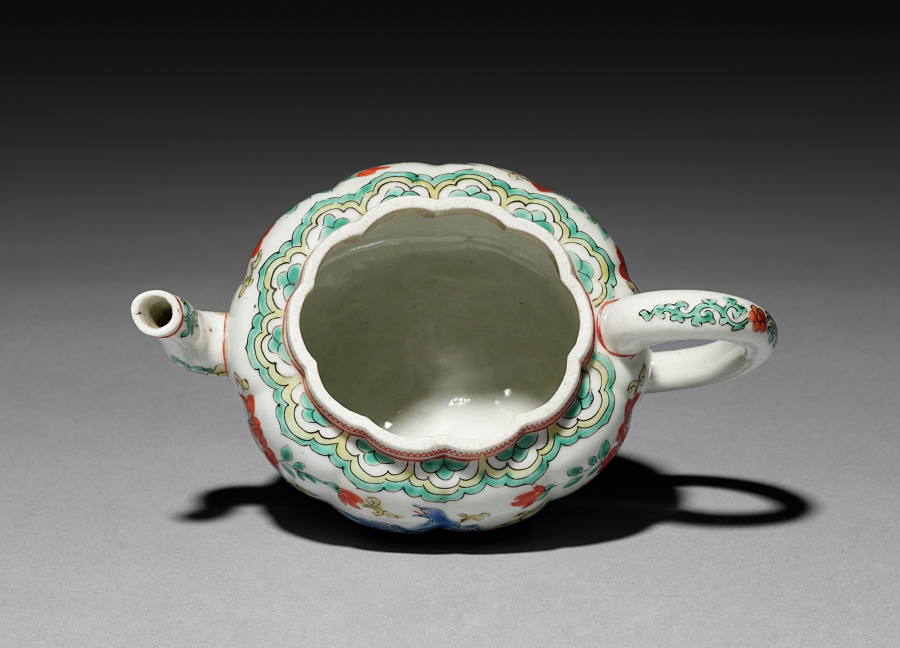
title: Teapot with Birds and Flowers (base)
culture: Japan, Edo period (1615–1868)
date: 1700s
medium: Porcelain with overglaze color enamel (Arita ware)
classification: Ceramic